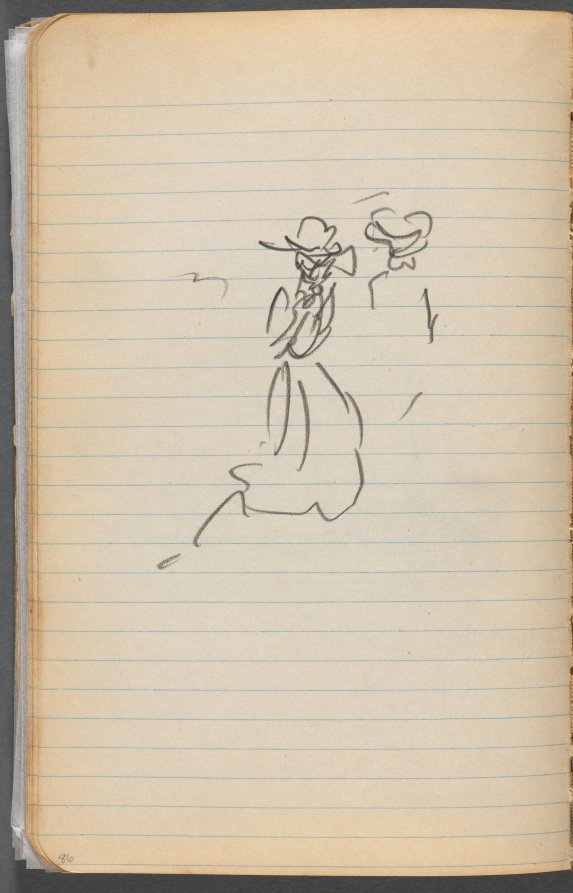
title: Sketchbook, page 086: Two Figures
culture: America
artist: Maurice Prendergast (American, born Newfoundland [now Canada], 1858–1924)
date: 1905–10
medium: graphite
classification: Bound Volume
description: This sketchbook contains 69 pages of drawings, a diary largely devoted to the state of the artist's health, and a three-page discourse on the nature of genius and ideas.